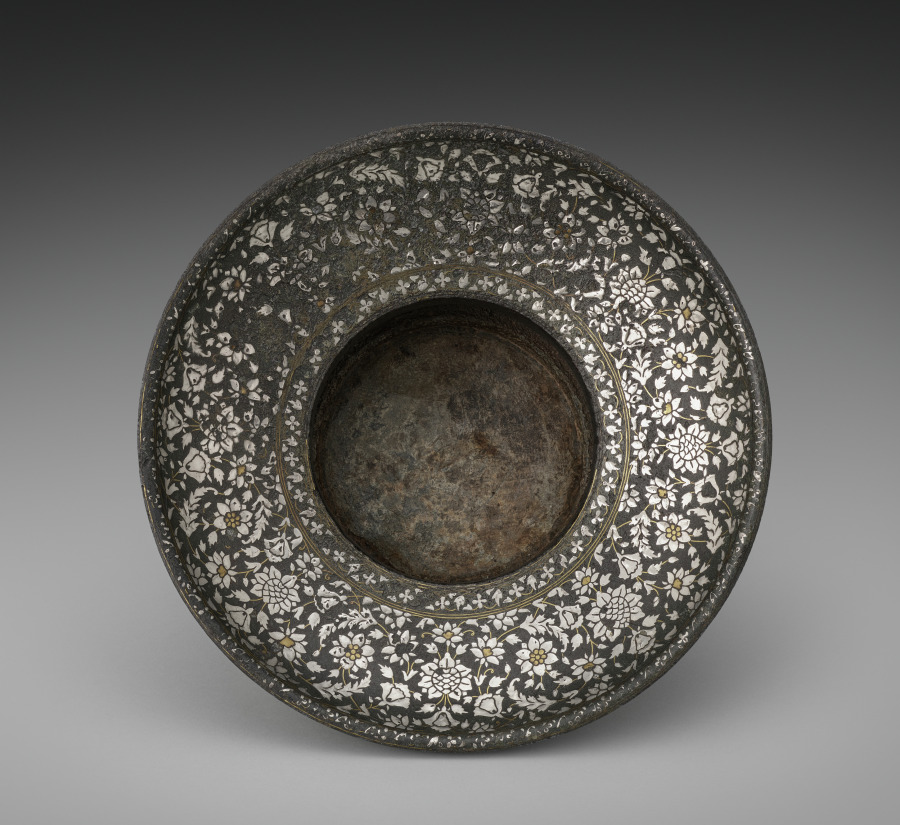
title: Bidri Basin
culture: Southwestern India, Deccan, Karnataka, Bidar​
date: c. 1650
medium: Zinc alloy with silver and brass inlay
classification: Metalwork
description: Wide-rimmed basins called sailabchi were used to catch water poured from a pitcher during hand washing before prayer and before and after meals. A sumptuous example such as this was made for an elite setting. Every element of the allover floral arabesque was cut from silver and brass sheets or wire and hammered into the cast zinc alloy vessel in a distinctive technique developed in southern India.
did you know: Zinc alloy does not rust or corrode, in contrast to steel or copper alloys.